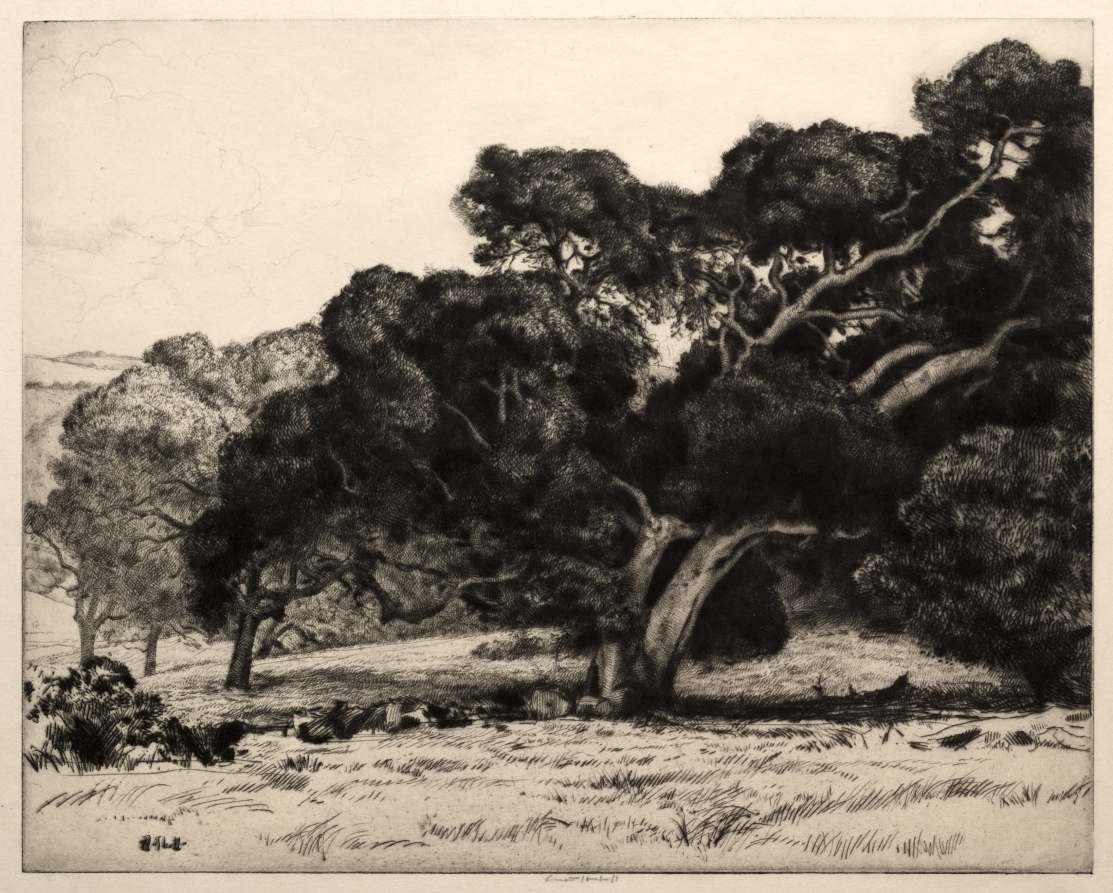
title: Large Live Oak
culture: America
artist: Ernest Haskell (American, 1876–1925)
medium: drypoint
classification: Print